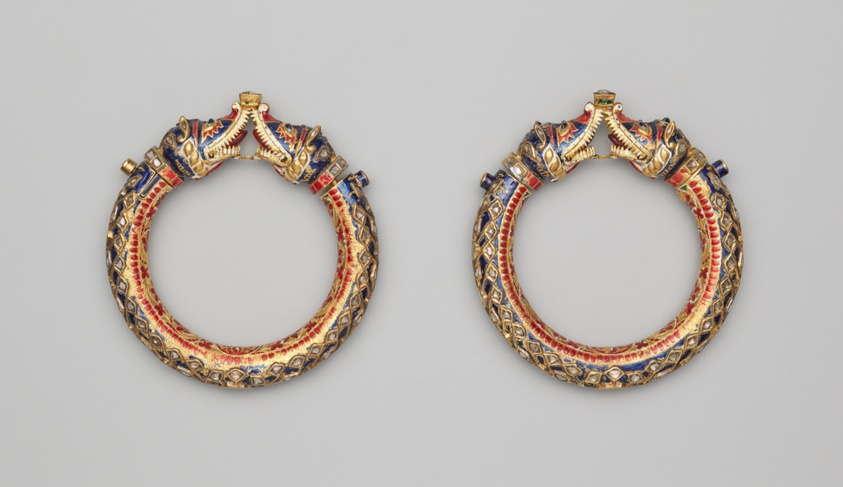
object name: Costume and Accessories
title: Pair of Bracelets with Confronting Makara Heads (Karas)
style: South Asian, mughal, Indian (South Asian), asian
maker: India; Rajasthan, Jaipur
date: 19th century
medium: Gold with diamonds set in the kundan technique with polychrome enamel (minakari)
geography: India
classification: bracelet (jewelry); jewelry; asian art; costume